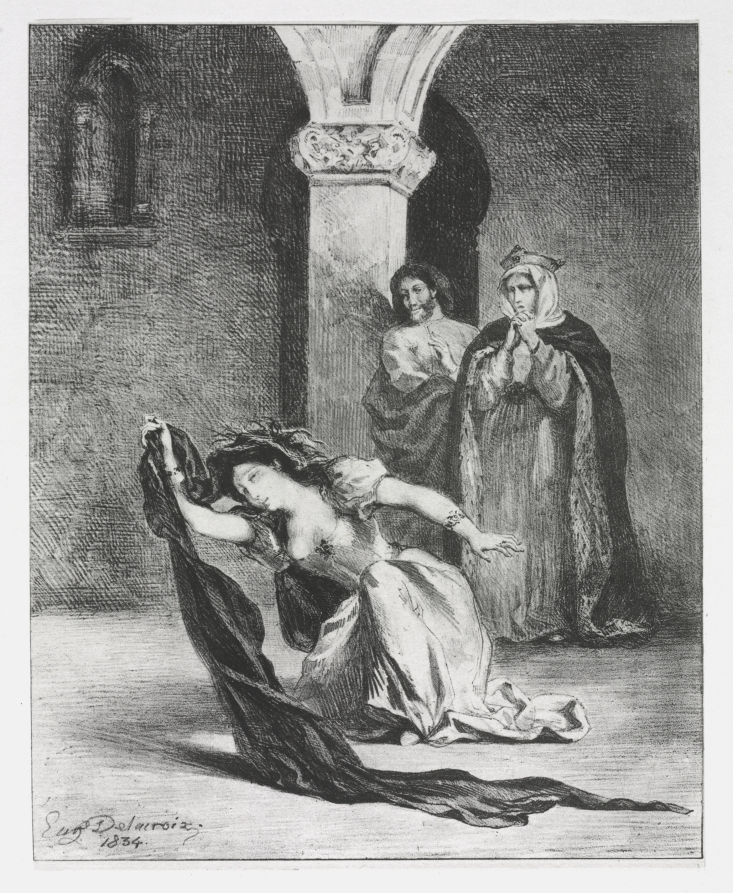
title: Hamlet: The Chant of Ophelia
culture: France, 19th century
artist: Eugène Delacroix (French, 1798–1863)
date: 1834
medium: lithograph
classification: Print